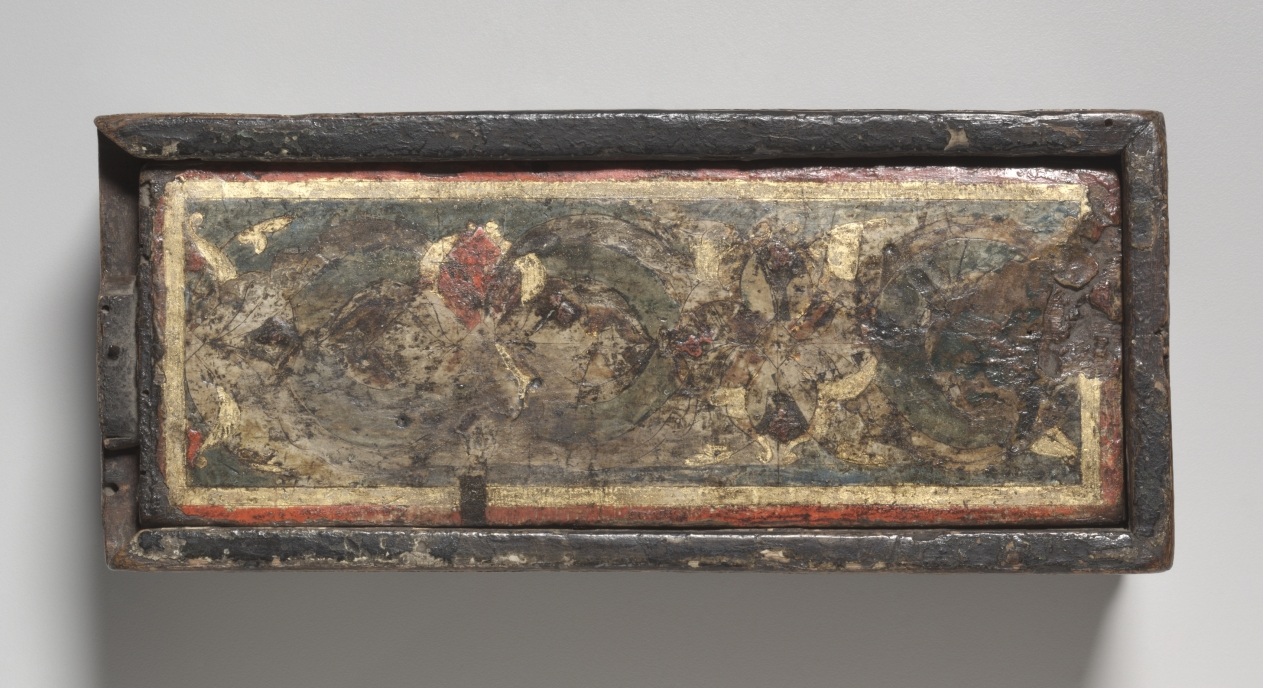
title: Reliquary Box with Scenes from the Life of John the Baptist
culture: Byzantium, Constantinople, late Byzantine period, 14th century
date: 1300s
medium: tempera and gold on wood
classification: Wood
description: John the Baptist--the first person to recognize Christ as the promised savior and the one who baptized him in the Jordan River--was one of the Byzantine Empire’s most revered saints. This box shows four scenes from the saint’s life: John’s martyrdom, Christ’s baptism, John’s birth, and the announcement of his birth to his parents. It probably once housed one of the saint’s relics; several were kept in churches and monasteries in Constantinople, including fragments of his skull and right arm and locks of his blood-clotted hair.